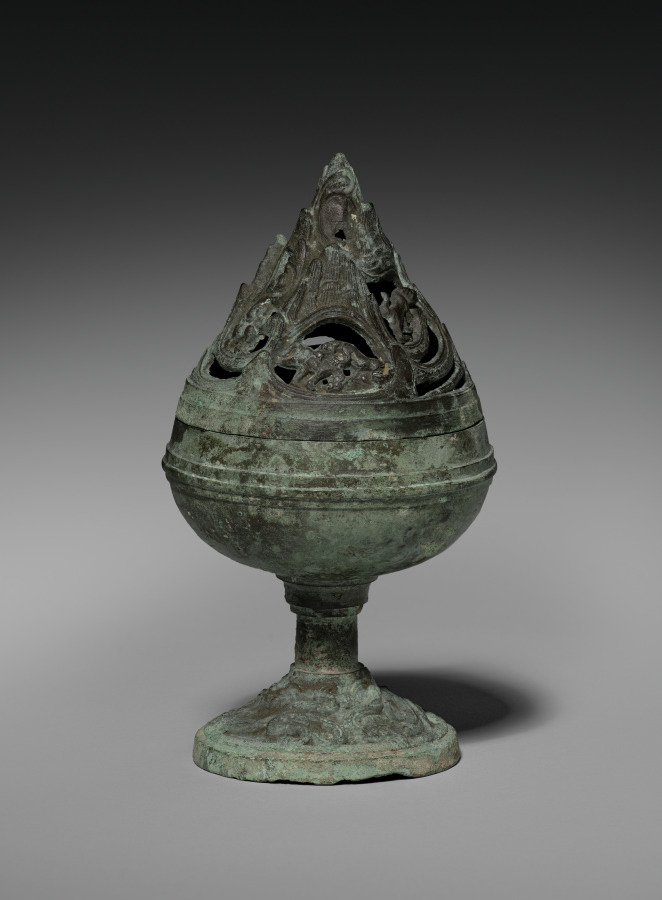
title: Incense Burner (Boshan Lu)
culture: China, Western Han dynasty (206 BCE–8 CE)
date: 200–100 BCE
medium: bronze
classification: Metalwork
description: The conical cover of this incense burner represents a miniature mountain with hunting scenes. The cover was shrouded in mist and emanated intoxicating smoke through its openwork when fragrant woods and herbs were burnt in its stem cup, transporting its beholder into an imaginative realm.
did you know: Deities (appearing as hunters) and fantastic beasts roam freely among mists and clouds on this incense burner.